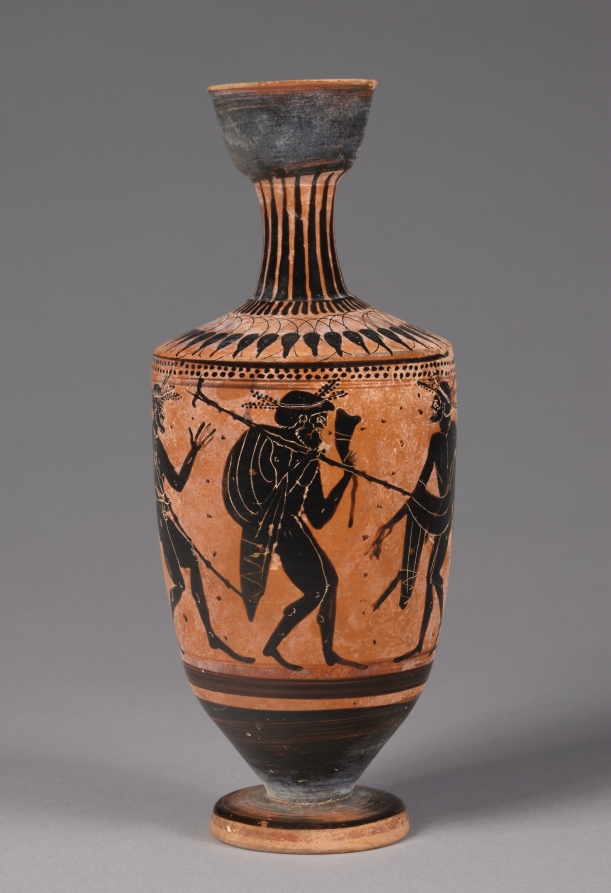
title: Black-Figure Lekythos (Oil Vessel): Komos (Revel)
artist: attributed to The Group of Cleveland 16.1061 (name vase)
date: c. 500 BCE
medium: ceramic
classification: Ceramic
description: Three bearded figures dance or cavort on this oil vessel, each wreathed, loosely draped with a cloak, and holding a staff. The central figure also holds a drinking horn, though all may well have been drinking. The painter of this vase is unknown, but the style of drawing has been linked to a similar vessel now in Syracuse, Sicily.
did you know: The small black marks between and around the figures are mock letters, perhaps indicating illiteracy.